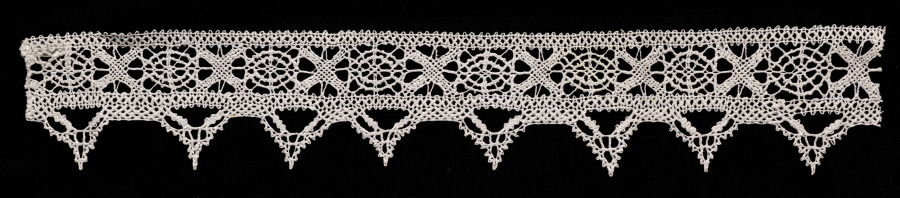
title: Lace Insertion and Edging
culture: Italy, Venice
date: 1540–60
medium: Bobbin lace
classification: Lace